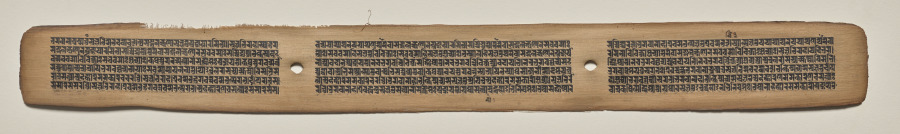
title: Text, Folio 141 (recto), from a Manuscript of the Perfection of Wisdom in Eight Thousand Lines (Ashtasahasrika Prajnaparamita-sutra)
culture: Eastern India, Bihar, Vikramashila Monastery. Painting: Nepal, Kathmandu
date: Sunday, September 14, 1119 (year 239 of the Newar Samvat in the month of Ashvina)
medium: gum tempera and ink on palm leaves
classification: Painting